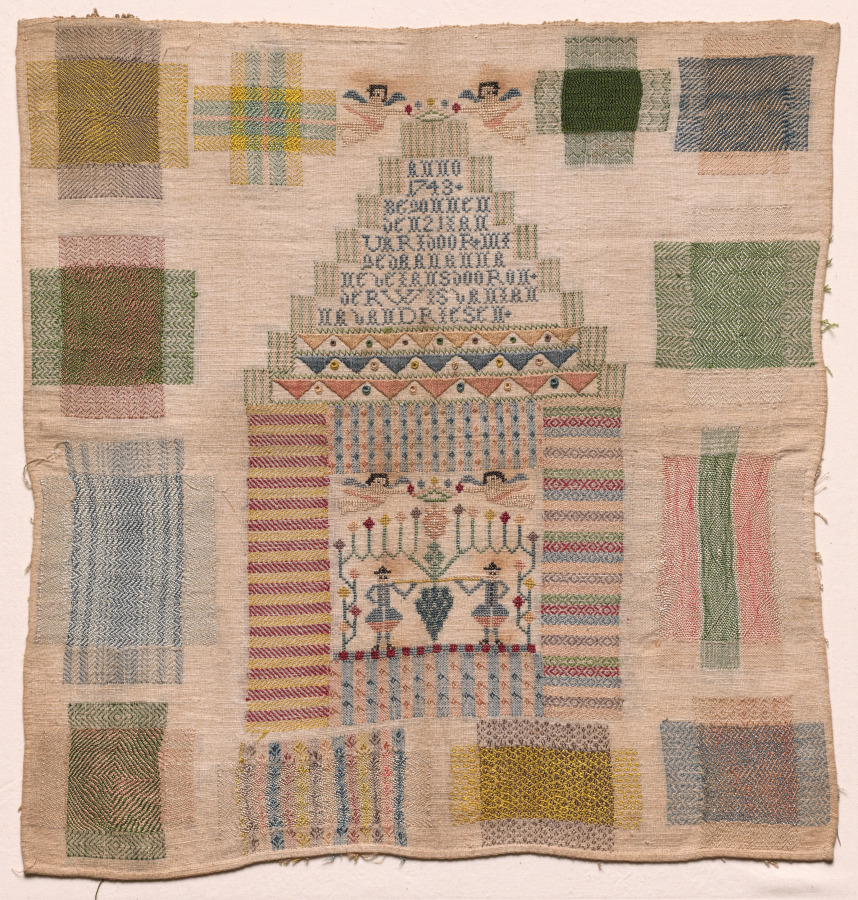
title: Sampler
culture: Netherlands, mid 18th century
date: 1743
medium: embroidery; silk on wool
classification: Sampler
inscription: "Anno/ 1743/ Begonnen/ den 21 Jan/ Uari door mi/ gedaan Anna/ Nevejans door on/ derwis van Jan/ na van Driesen."